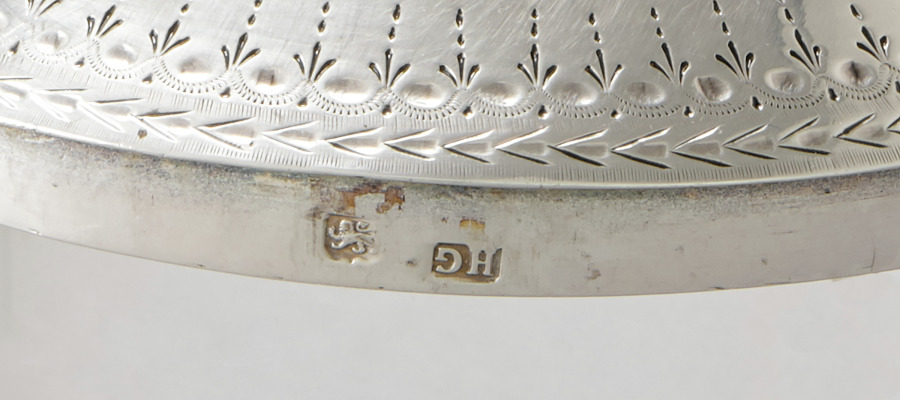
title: Tea Urn (lid)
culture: England, London, 18th century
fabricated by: Henry Greenway (British)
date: 1781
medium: silver and ivory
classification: Silver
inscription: engraved on body: coat of arms-- tower surrounded by three covered cups; crest consisting of a squirrel. Engraved on cover: crest consisting of a squirrel (coat of arms of Amcotts family).